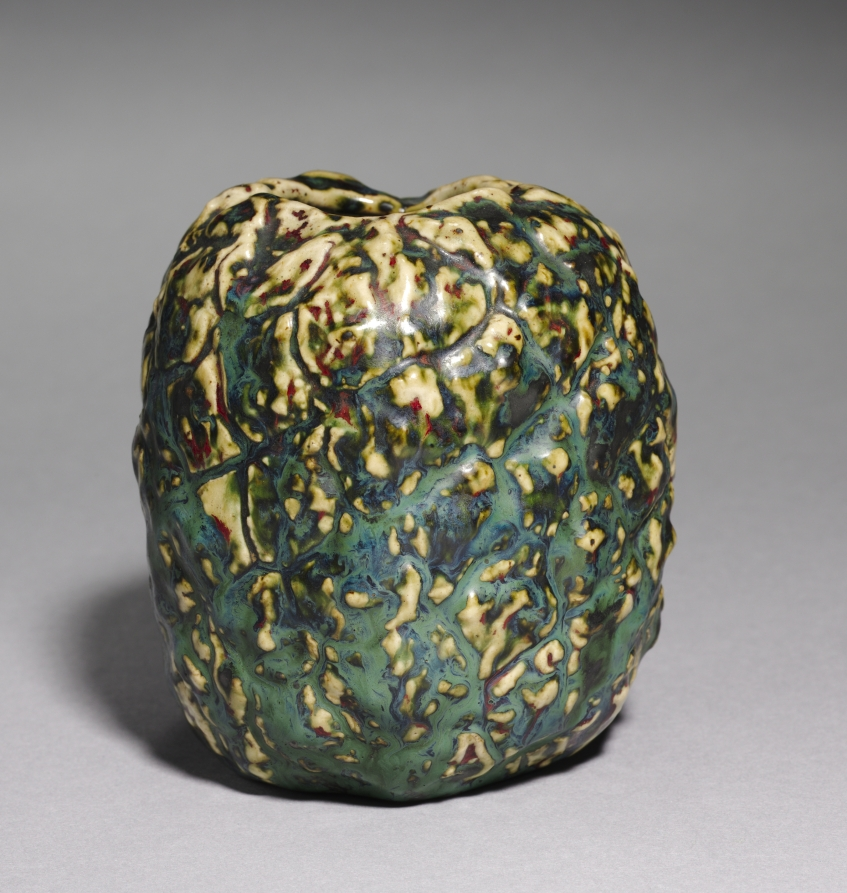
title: Vase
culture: France, early 20th Century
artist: Pierre Adrien Dalpayrat (French, 1844–1910)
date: c. 1900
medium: stoneware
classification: Ceramic